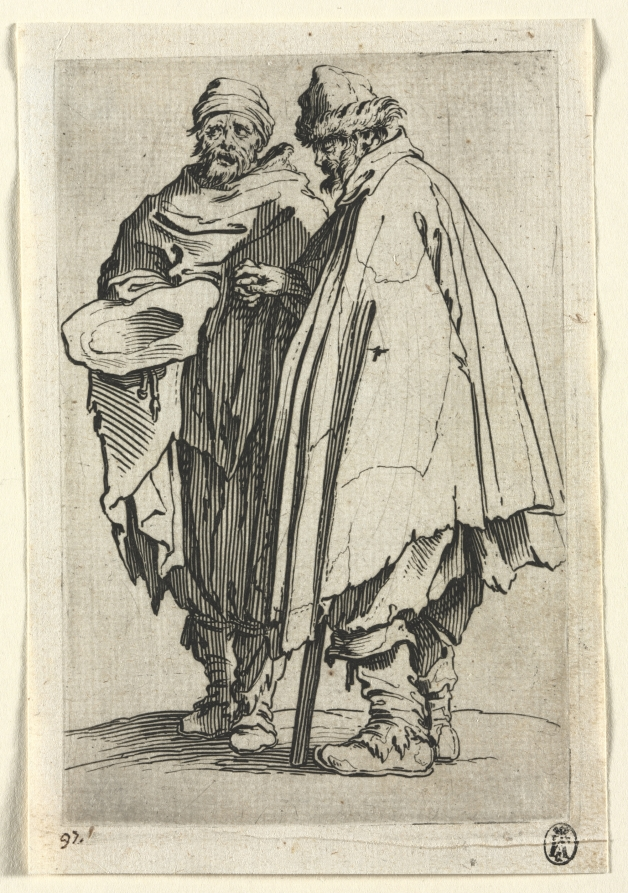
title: The Beggars: The Blind Man and His Companion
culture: France, 17th century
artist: Jacques Callot (French, 1592–1635)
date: c. 1623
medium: etching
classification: Print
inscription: Inscribed lower left in pen and brown ink: "97."